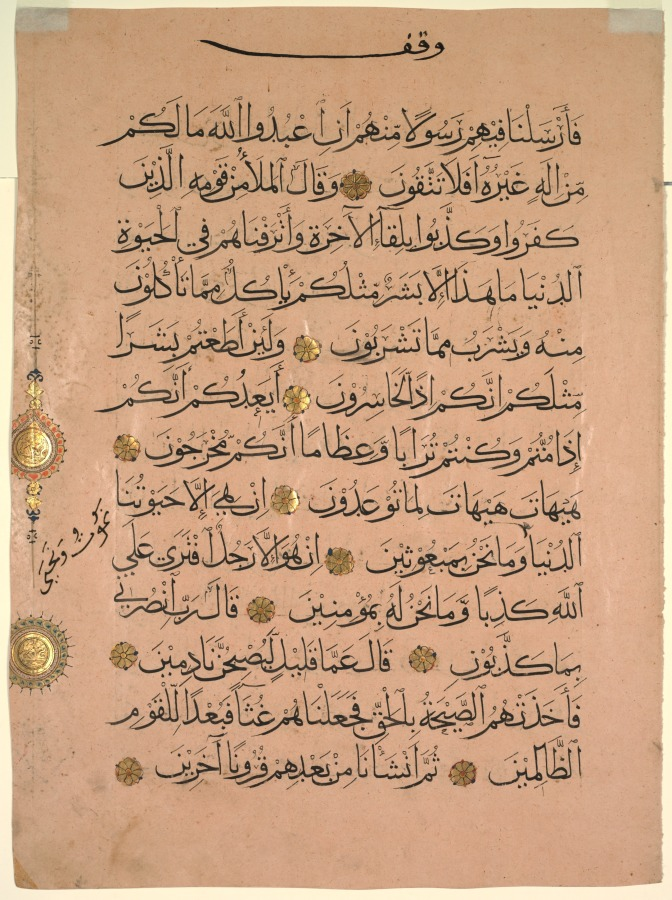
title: Leaf from a Qur'an (recto)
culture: Egypt, Cairo, Mamluk Sultanate (1250–1517)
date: 1300s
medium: ink, gold, color on pink paper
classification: Manuscript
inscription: 13 lines of muhaqqa script; waqf inscription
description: It is through the Arabic language that the Qur’an was revealed to the Prophet Muhammad in the 600s. As a result, calligraphy is celebrated as the highest form in Islamic art. This page shows 13 lines from the Qur’an in muhaqqa script, one of the six main script types of Arabic calligraphy. The Qur’an’s importance explains the significance of calligraphy; however, the latter was not restricted to just religious texts. Many objects in the Islamic art gallery bear calligraphic inscriptions and come from secular contexts, displaying the versatility and creativity of this art form.